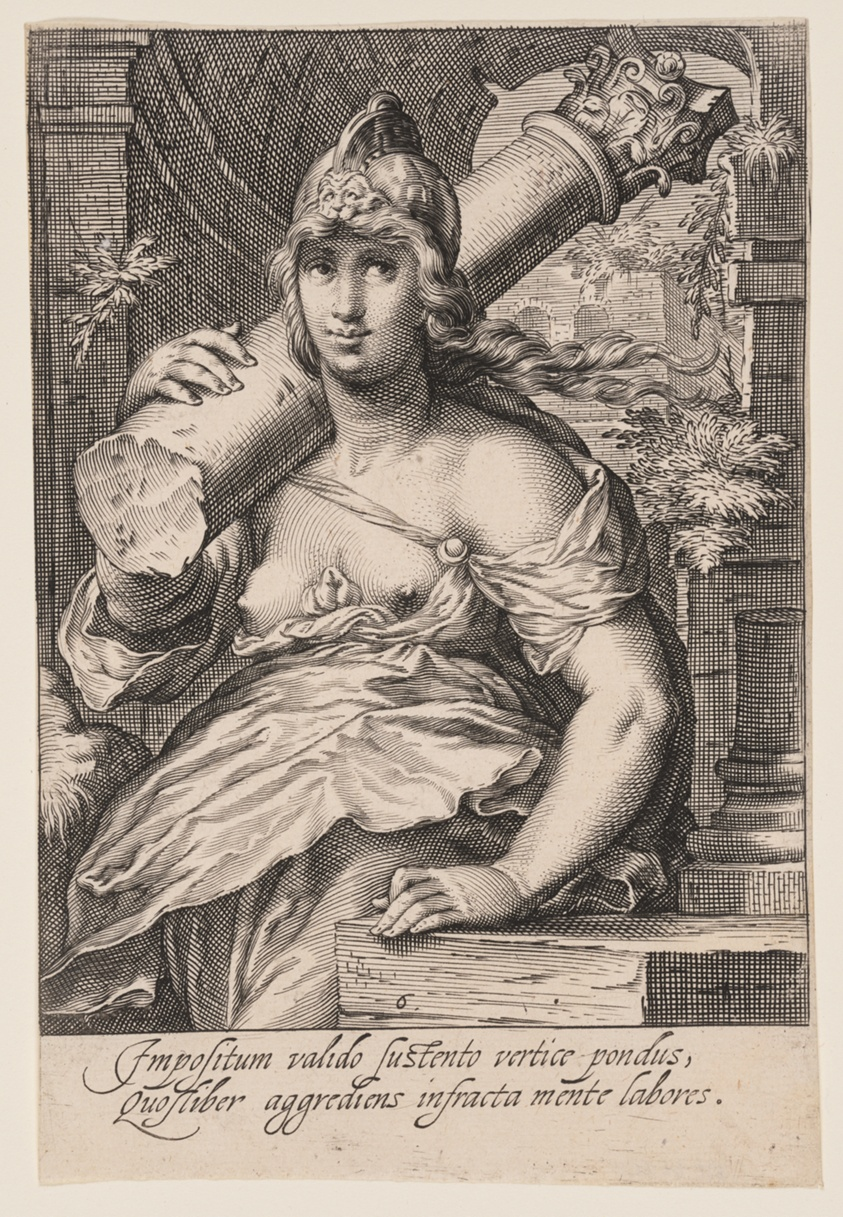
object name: Print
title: Fortitude, from The Seven Virtues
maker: Jacob Matham (Dutch, 1571–1631); after Hendrick Goltzius (Dutch, 1558–1617)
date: 1597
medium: Engraving on paper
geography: Netherlands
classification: engraving; paper; print; prints and drawing